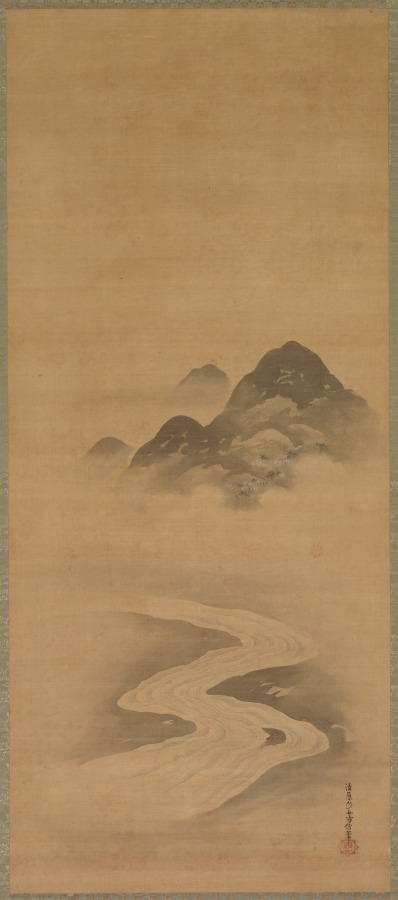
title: Minamoto no Nakakuni Visits Lady Kogō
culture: Japan, Edo period (1615–1868)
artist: Kiyohara Yukinobu (Japanese, 1643–1682)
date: late 1600s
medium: One of a triptych of hanging scrolls; ink and color on silk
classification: Painting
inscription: 款記「清原氏女雪信筆」/「清原女」朱文八角印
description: Kiyohara Yukinobu was one of Japan's earliest and most talented female painters. Kiyohara preferred Japanese-style painting techniques and subjects. Her work depicts the scenery and history of her native land. In addition to the tonalities of ink, she applied a delicate range of colors that help identify the seasons, an important theme in Japanese life and culture.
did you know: This day-lit spring scene is the right part of a triptych presenting an episode from The Tale of the Heike.